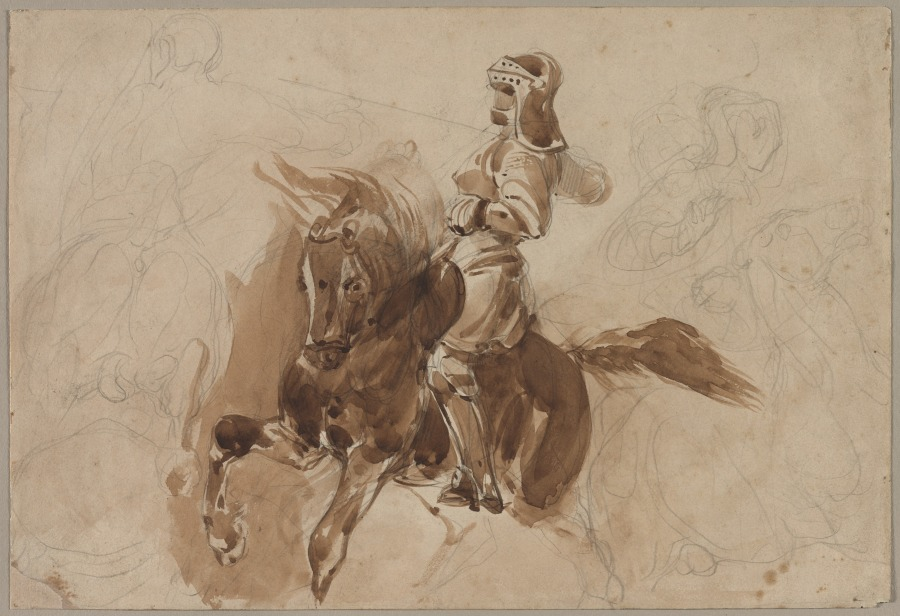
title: Armored Figure on Horseback (recto); Horse in Front of a Barn (verso)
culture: France, 19th century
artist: Eugène Delacroix (French, 1798–1863)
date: c. 1828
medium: graphite and brush and brown wash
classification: Drawing